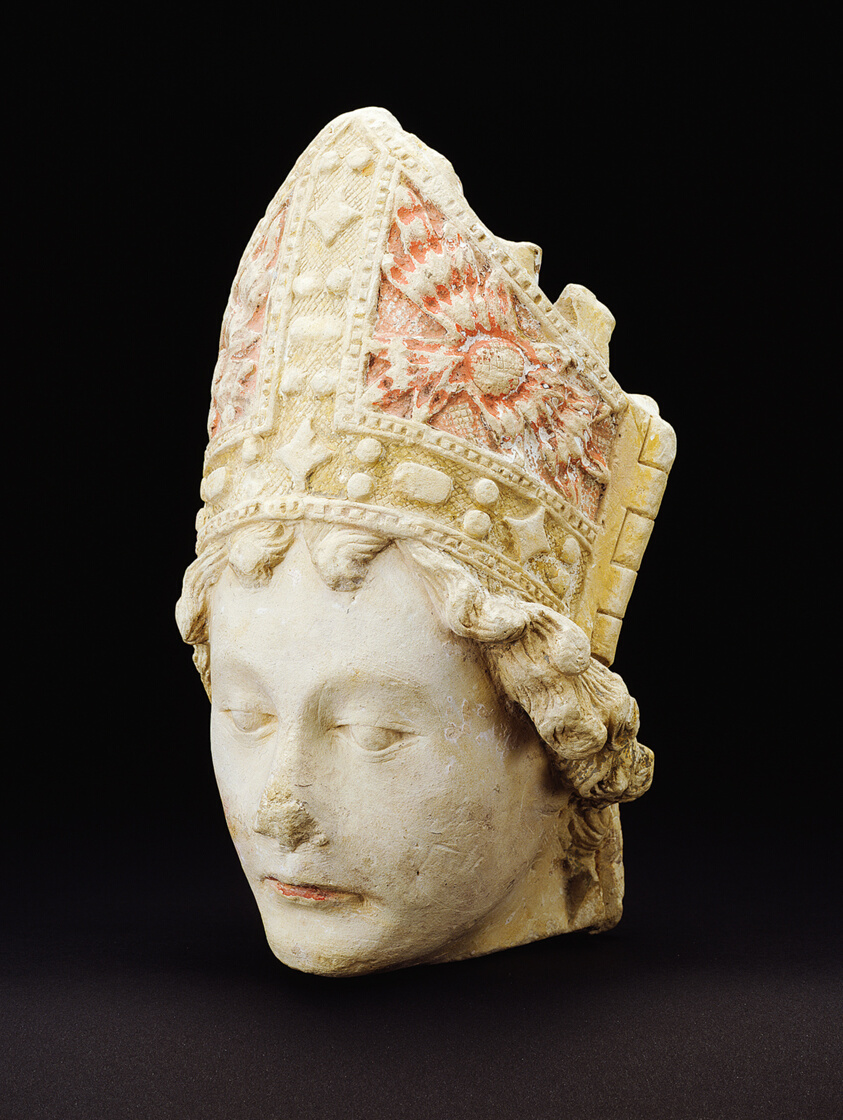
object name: Sculpture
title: Head of a Bishop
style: sixteenth century, 15th century, 16th Century, Renaissance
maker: French; Périgord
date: c. 1500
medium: Limestone, traces of polychromy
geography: France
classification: bust/head; sculpture; french; limestone; sculpture/stone; stone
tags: heads, Fragment, man, religion, religious, religious attire, religious figures